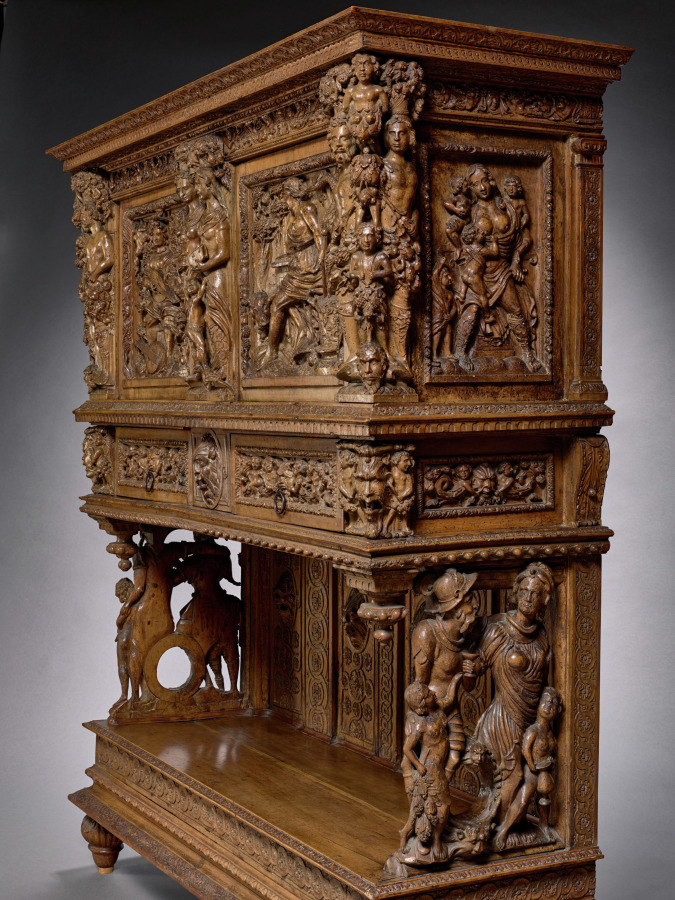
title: Dressoir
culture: France, Burgundy, 16th century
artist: style of Hugues Sambin (French, 1518–c. 1601)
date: mid 1500s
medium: walnut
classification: Furniture and woodwork